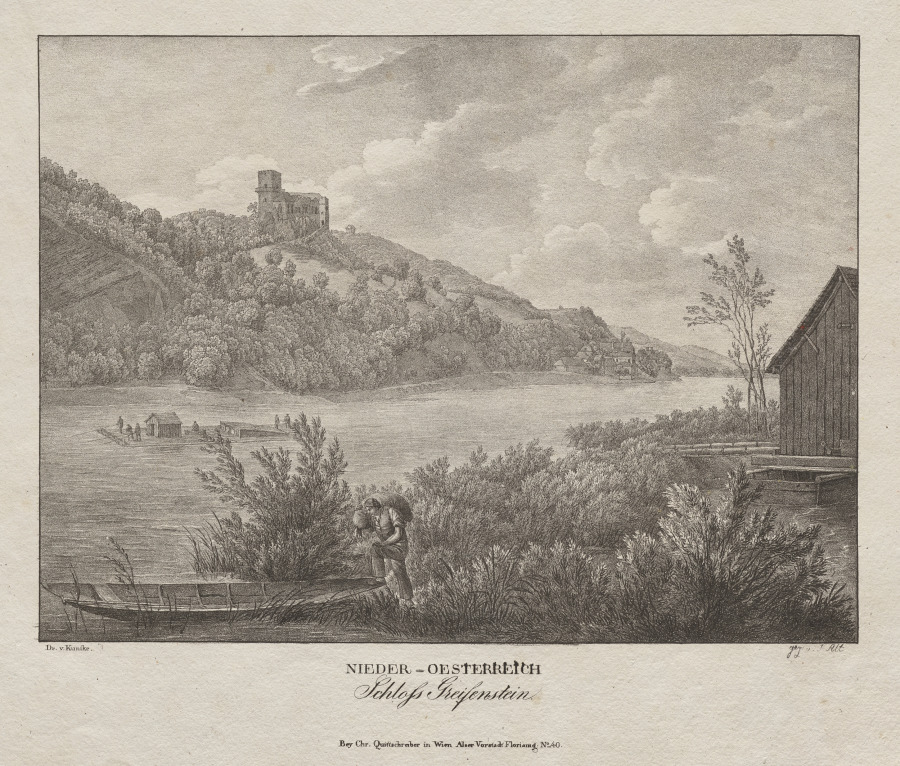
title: Nieder-oesterreich, Schloss Greifenstein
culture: Austria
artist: Jakob Alt (Austrian, 1789–1872)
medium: lithograph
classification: Print